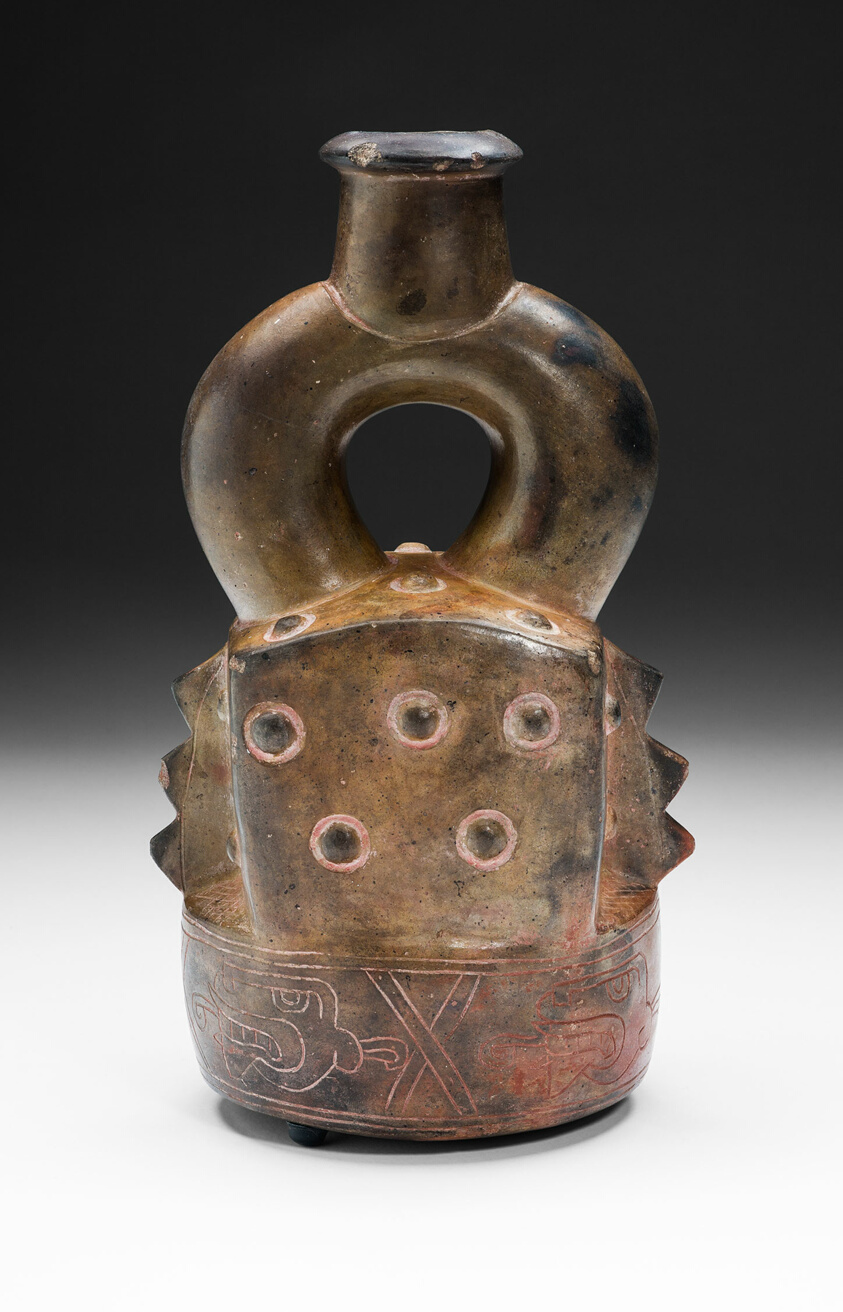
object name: Vessel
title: Vessel with Figure Seated Inside a Structure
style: chavín horizon, early horizon, Pre-Columbian, americas, andes, Arts of the Americas, andean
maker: Chavín (North coast, Peru)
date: c. 800 BCE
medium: Ceramic and pigment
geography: Peruvian North Coast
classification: earthenware; art of the americas; ceramics; vessel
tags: architecture, supernatural, figures (representations), houses, temple